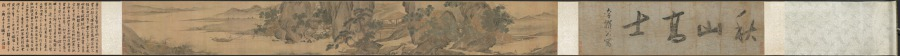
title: Scholar-Hermits in the Autumn Mountains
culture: China, Ming dynasty (1368–1644)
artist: Tang Yin (Chinese, 1470–1523)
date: 1500–1510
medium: handscroll, ink and light color on silk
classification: Painting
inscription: Artist's signature and 2 seals at end of scroll: Tang Yin [seals] T'ang Po-hu; T'ang Tzu'wei t'u-shu.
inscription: Title on frontispiece by Li Cho-kung (dates unknown).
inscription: 1 colophon and 11 additional seals: 1 colophon dated 1915 of Wu Tso-hsi (19th-20th c.); 2 seals of Gao Qifeng 高奇峰 (1889–1933); 5 seals of C. C. Wang 王季遷 (1907–2003); 4 seals unidentified.